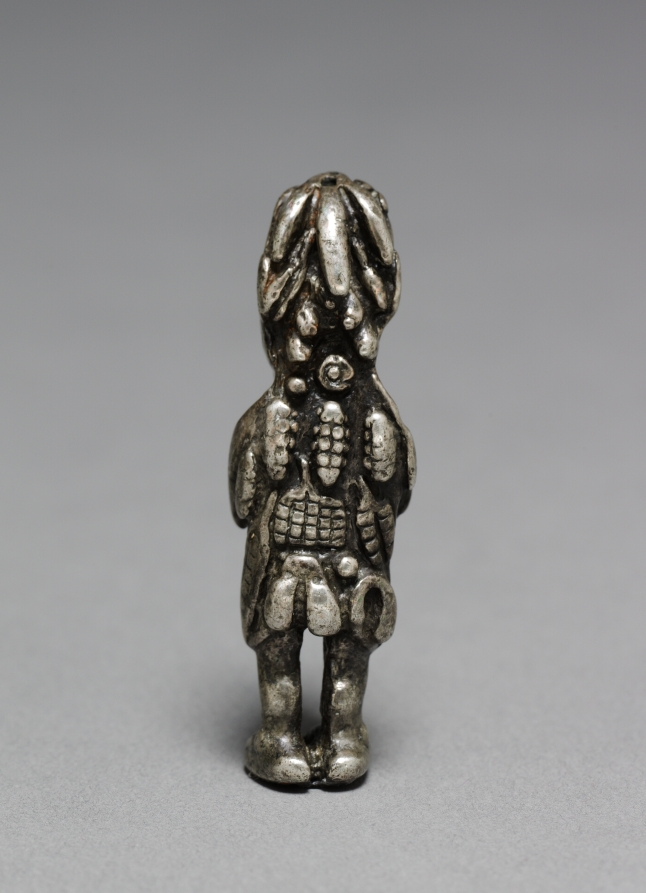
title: Agricultural Figurine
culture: Peru, Inka style (1400-1532)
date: 1400–1532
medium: cast silver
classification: Sculpture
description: Precious metal was a major Inka artistic medium, but most was melted down after the conquest to fund the Spanish court. The sole remains are small-scale objects from tombs and offerings. The body of the figurine is covered with fruits and vegetables and may have been made after the Spanish conquest.